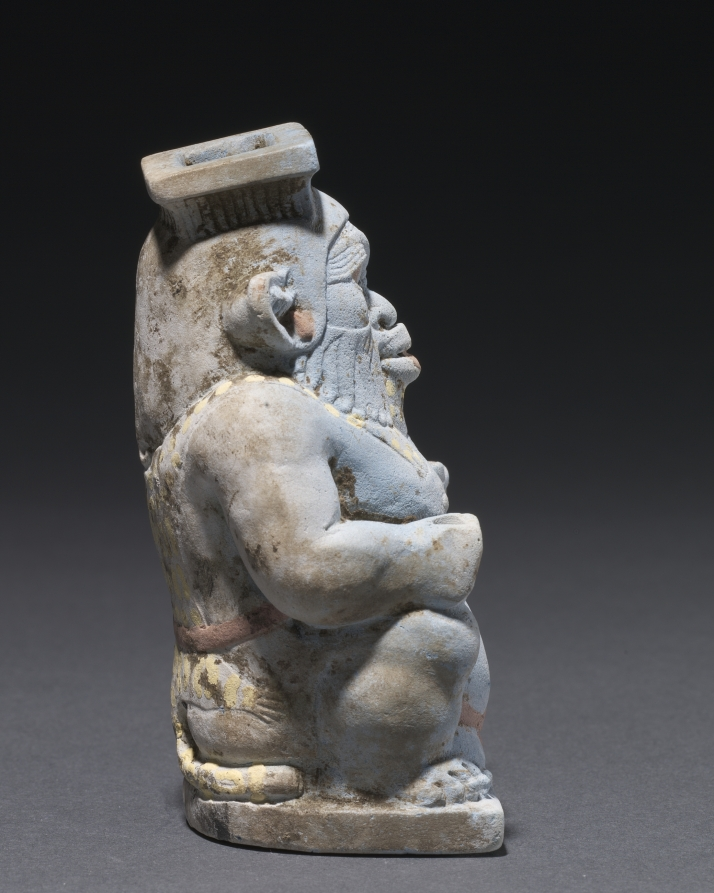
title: Cosmetic Jar in the Form of the God Bes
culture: Egypt, Late period (715–332 BCE), Dynasty 26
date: 664–525 BCE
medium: Egyptian blue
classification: Vessels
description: Both ancient Egyptian men and women loved cosmetics. Unguents, oils, and perfumes made from aromatic plant resins and gums were obtained at great cost from distant lands. The objects identified with cosmetics were given lavish treatment. The god Bes, patron god of cosmetics, is the subject of this colorful jar.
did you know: Bes was the Egyptian god of many things, including cosmetics, war, and childbirth.